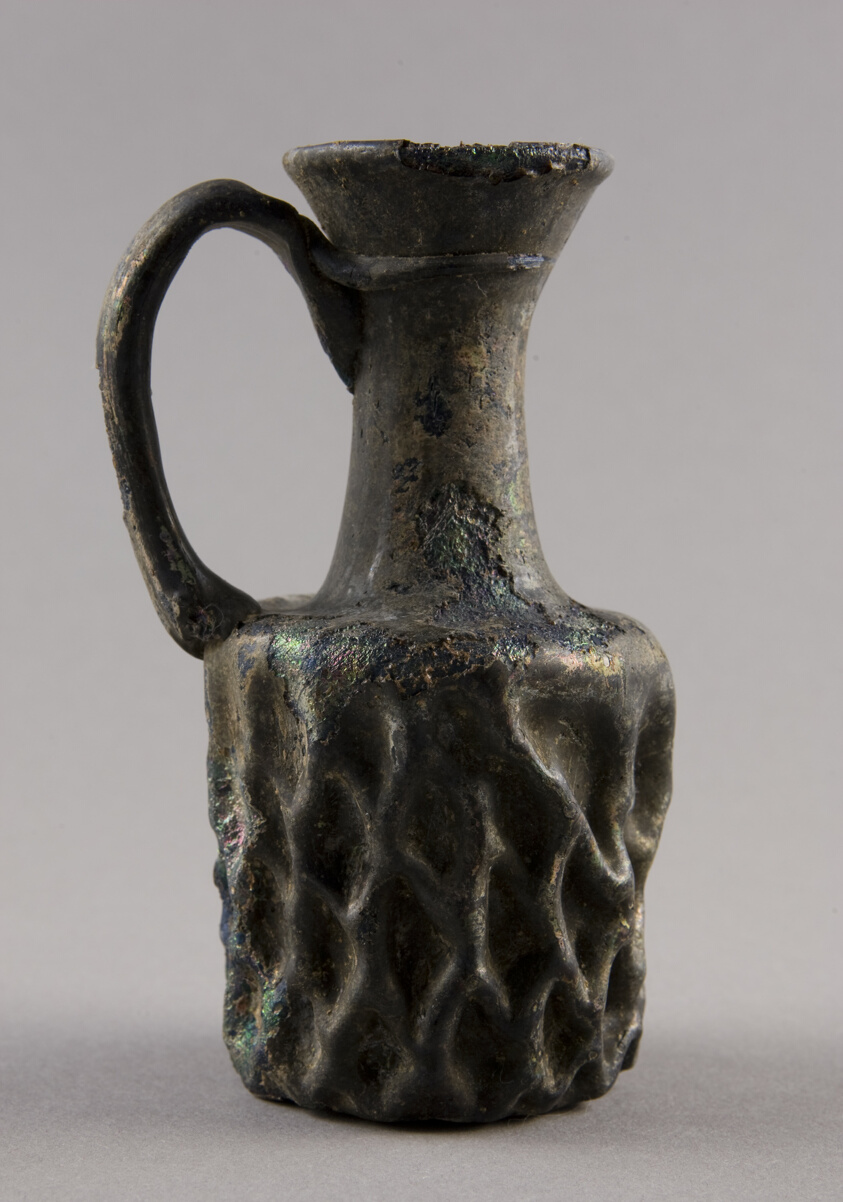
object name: Vessel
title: Pitcher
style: syrian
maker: Roman; Levant or Syria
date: 3rd-4th century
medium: Glass, blown technique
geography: Syria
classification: glass; vessel; ancient art